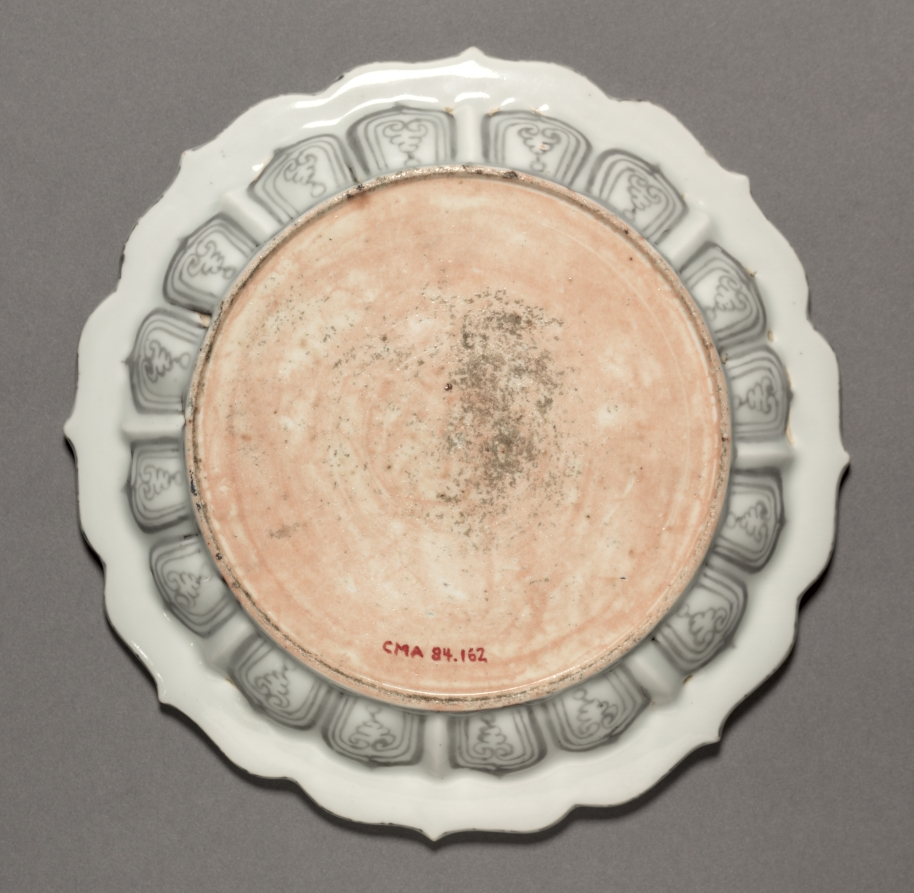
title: Cupstand with Floral Scrolls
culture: China, Ming dynasty (1368-1644), Hongwu reign (1368-1398)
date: 1368–1398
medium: porcelain painted in underglaze red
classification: Ceramic